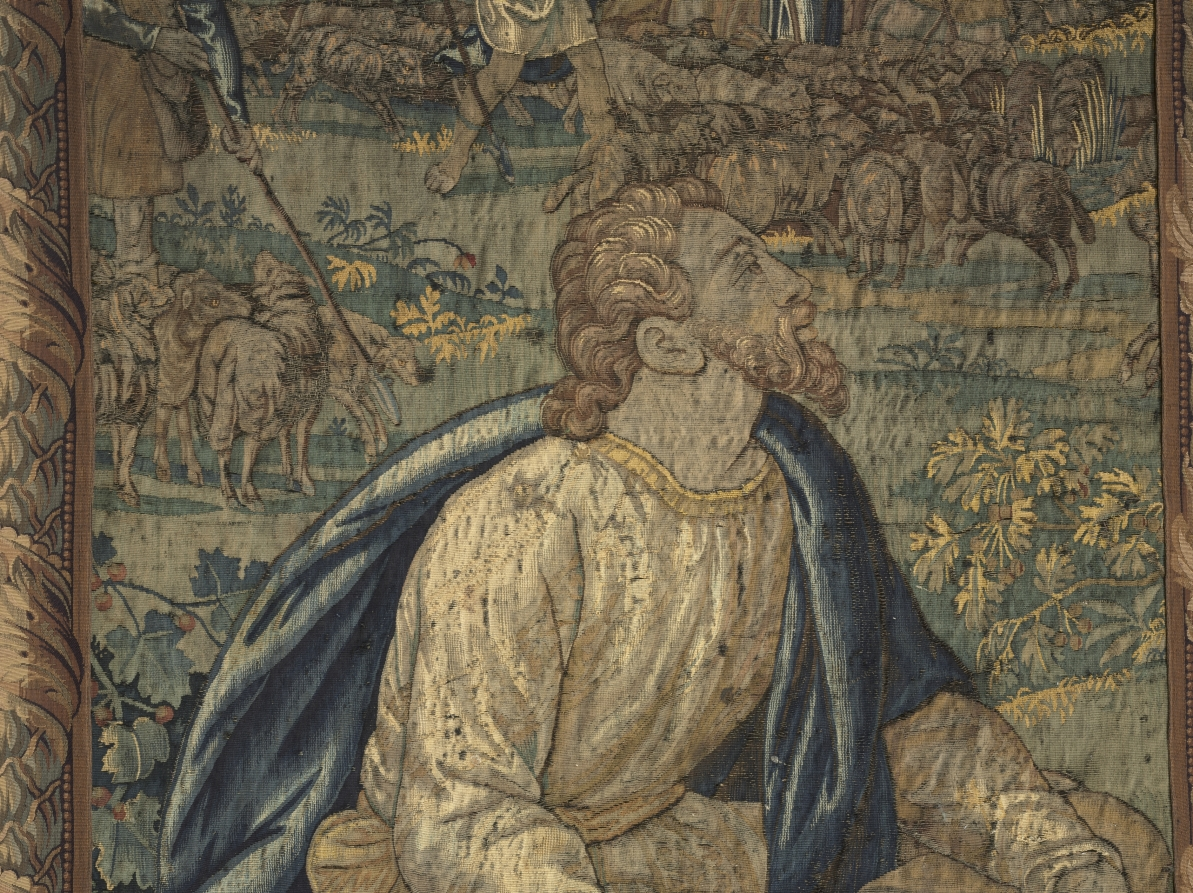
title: Moses and Jethro's Daughter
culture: Flanders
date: 1600s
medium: Wool: tapestry weave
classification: Tapestry